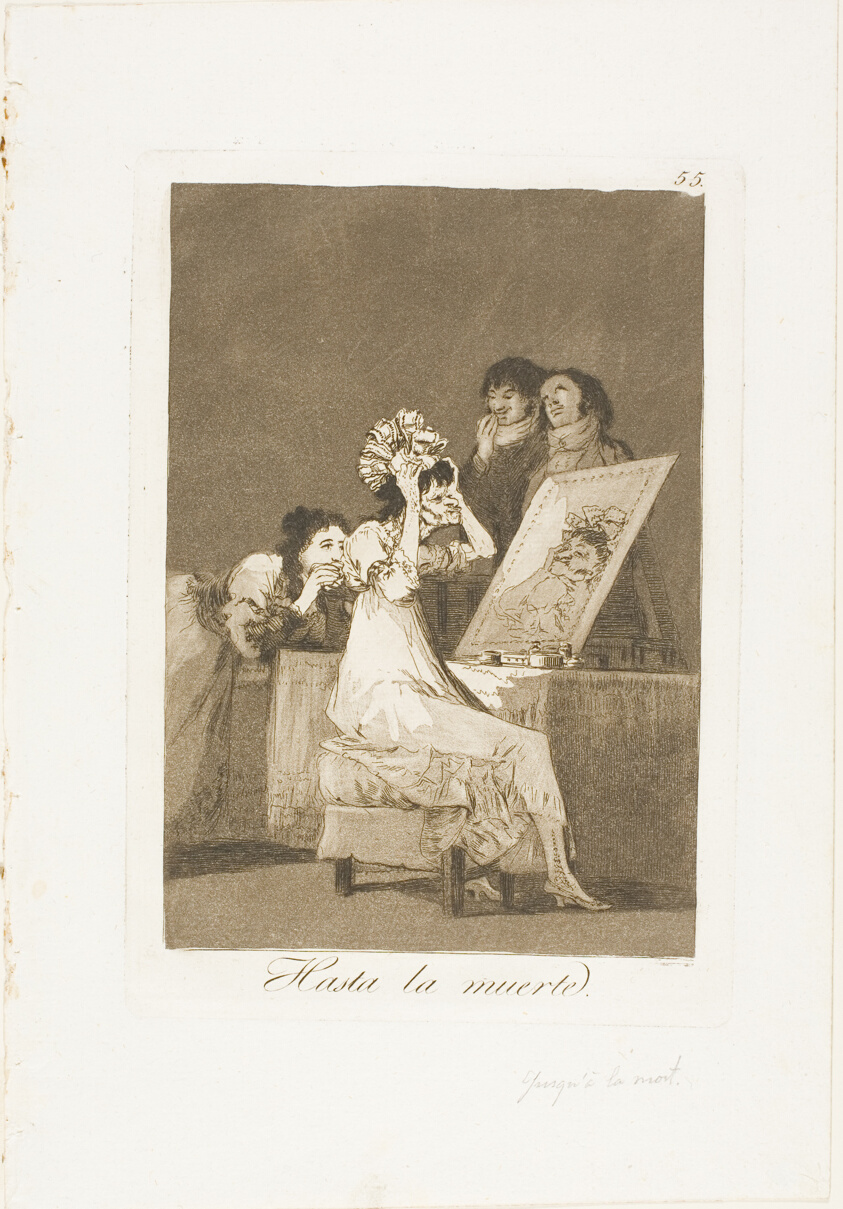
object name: Print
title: Until Death, plate 55 from Los Caprichos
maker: Francisco José de Goya y Lucientes (Spanish, 1746-1828)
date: 1797/99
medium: Etching and aquatint in warm black on ivory laid paper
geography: Spain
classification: etching; print; prints and drawing